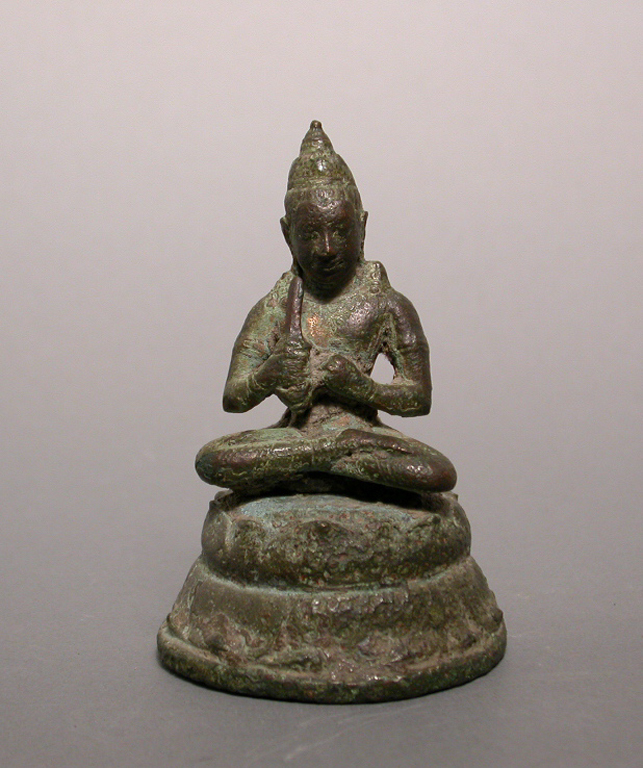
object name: Sculpture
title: Bodhisattva Manjushri (?)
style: Southeast Asian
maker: Indonesia; Central Java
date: 9th/10th century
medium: Bronze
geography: Central Java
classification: bronze; metal; sculpture; asian art